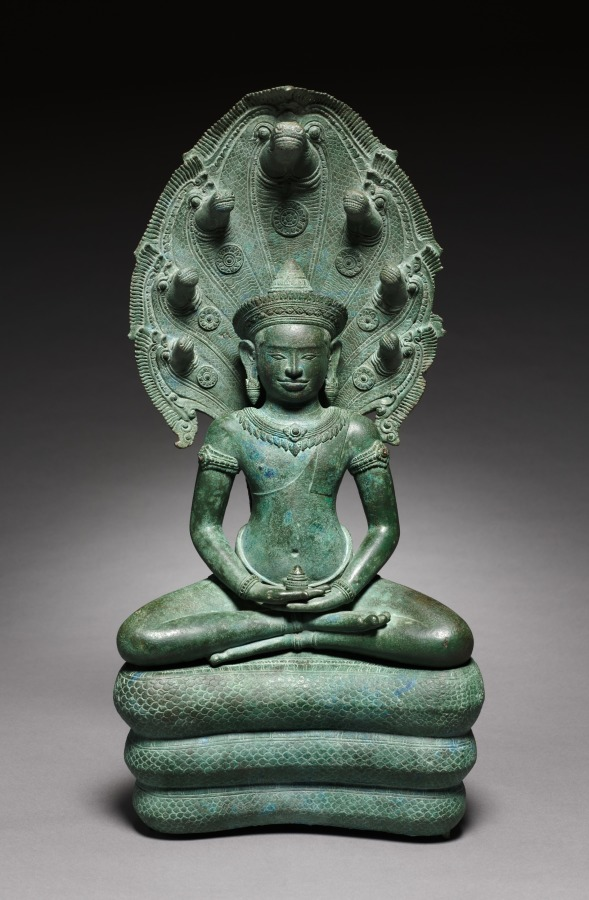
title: Naga-Enthroned Buddha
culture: Cambodia, Angkor, Angkor Wat Period, 12th century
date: 1100s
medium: bronze with traces of gilding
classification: Sculpture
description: Jayavarman VII, who built the great royal temple at Banteay Chhmar, linked himself with the image of the Buddha seated on a serpent, or naga, as the divine form under which he would be honored. During his reign, the naga-enthroned Buddha became a ubiquitous image for veneration, often set up together with Lokeshvara, who was associated with his father, and Prajnaparamita, the form under which his deceased mother was honored. Lokeshvara is the powerful enlightened being of compassion, while Prajnaparmita is the goddess who personifies wisdom. King Jayavarman VII, therefore, presented himself as the enlightened Buddha, the product of the union of Compassion and Wisdom, supported and glorified by the naga, which refers to the Khmer people. Images of the naga-enthroned Buddha have been found at Banteay Chhmar, both in architectural relief sculpture and as icons in the round. After the death of Jayavarman VII, followers of other forms of Buddhism (for example, Theravada) that became prevalent in Cambodia changed the meaning of the naga-enthroned Buddha and reinterpreted the image to refer to a scene from the historical Buddha’s life story in which a serpent protected him from a flood. The crowned and bejeweled aspect of this Buddha, though, indicates that it is another kind of transcendent figure. In his lap his hands are in a posture of meditation, holding what appears to be an offering of ceremonial rice referring to the hope that he will ensure the prosperity of the land.